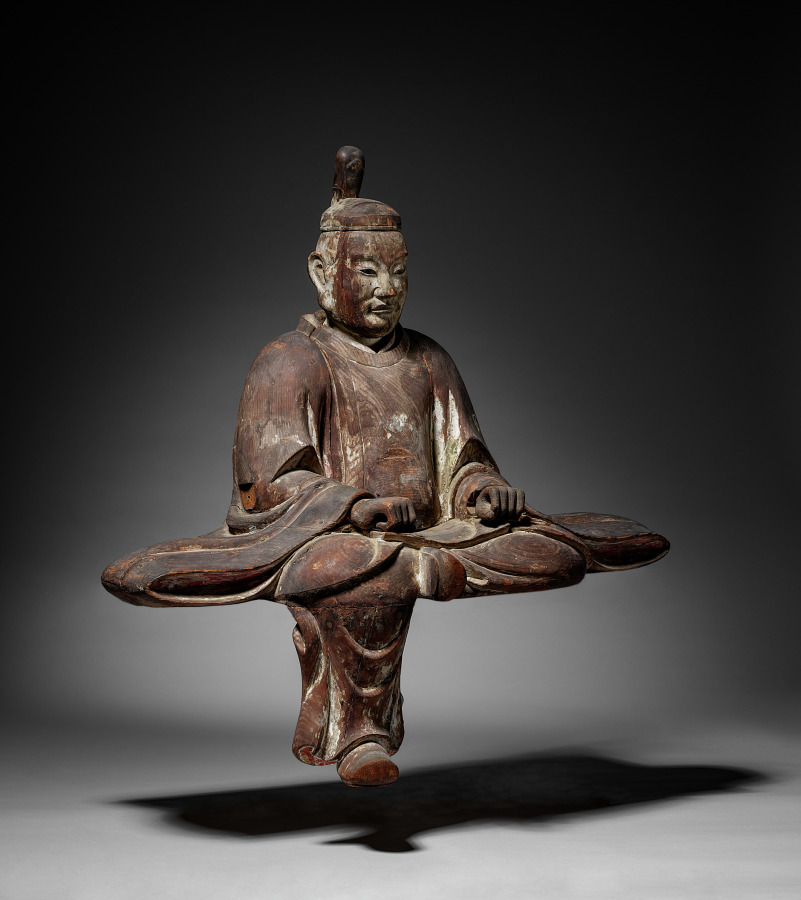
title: One of a Pair of Guardian Figures (Zuishin)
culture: Japan, Muromachi period (1392–1573) to Edo period (1615–1858)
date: c. 1560–1625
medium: Japanese cypress (hinoki) with traces of color; crystal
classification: Sculpture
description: Sculptors carved these two figures to look like members of the guard who protected the Japanese aristocracy in the 10th to 12th centuries. The pair belong in the roofed gate of a Shinto shrine. Their role was to embody the divine protectors of the deities, or kami, residing at the shrine. Their inset crystal eyes make them appear vigilant.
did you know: Some Japanese sculptors used to specialize in inset crystal eyes.